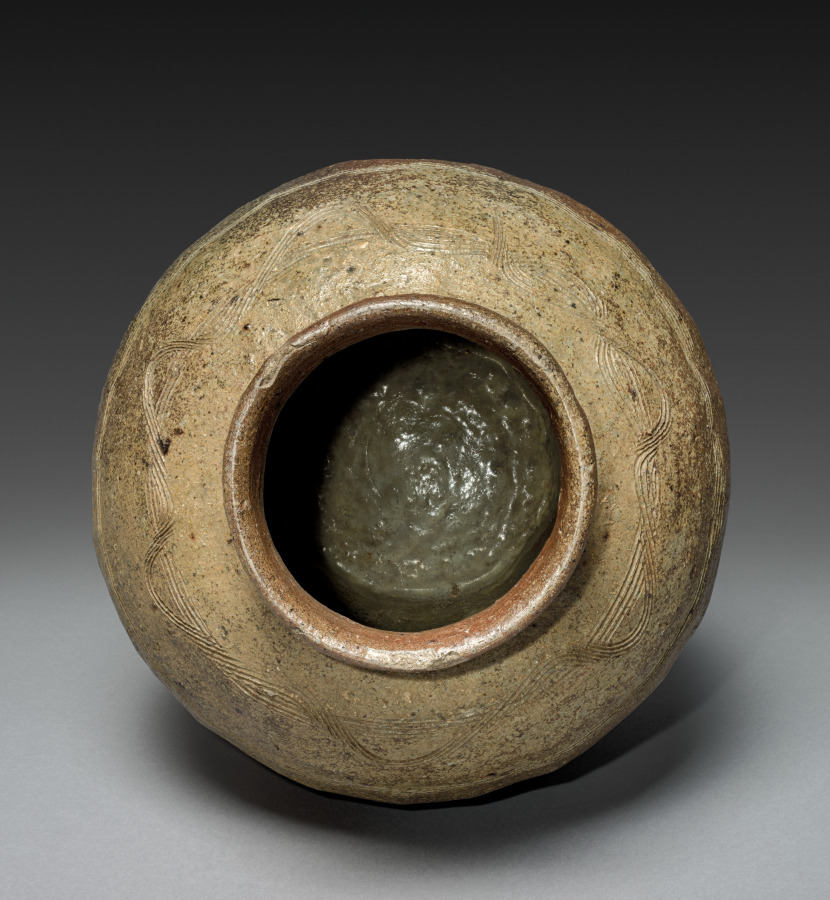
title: Jar with Incised Combed Shoulder Designs: Bizen Ware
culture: Japan, Muromachi period (1392–1573)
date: 1400s–1500s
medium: stoneware, ash glaze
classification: Ceramic